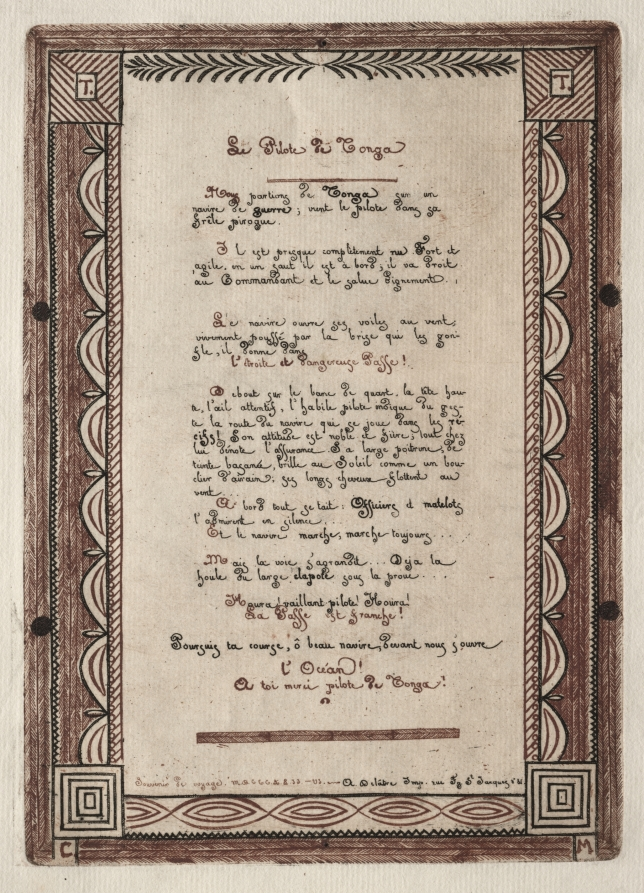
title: Verses to the Pilot of Tonga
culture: France, 19th century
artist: Charles Meryon (French, 1821–1868)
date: 1856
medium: etching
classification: Print